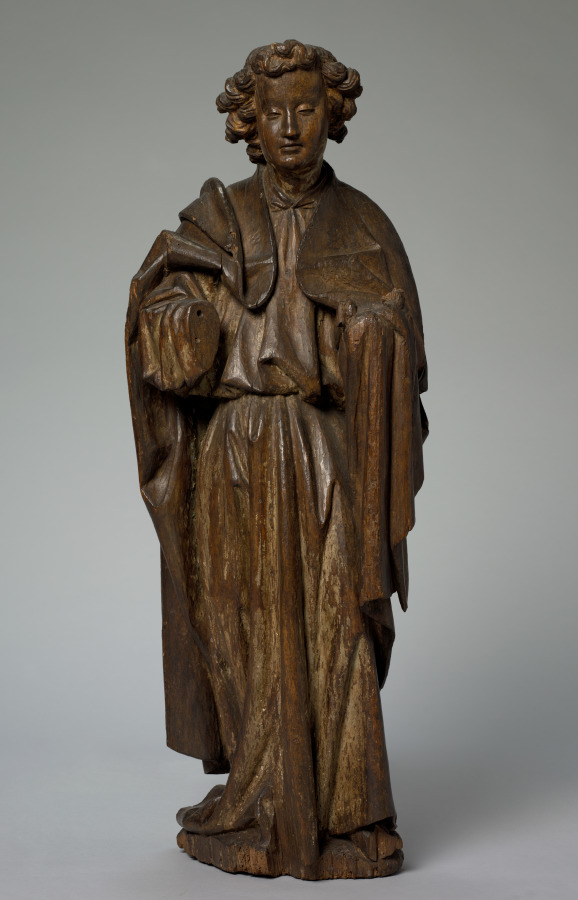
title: Angel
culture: Bruges?, Belgium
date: c. 1430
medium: oak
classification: Sculpture